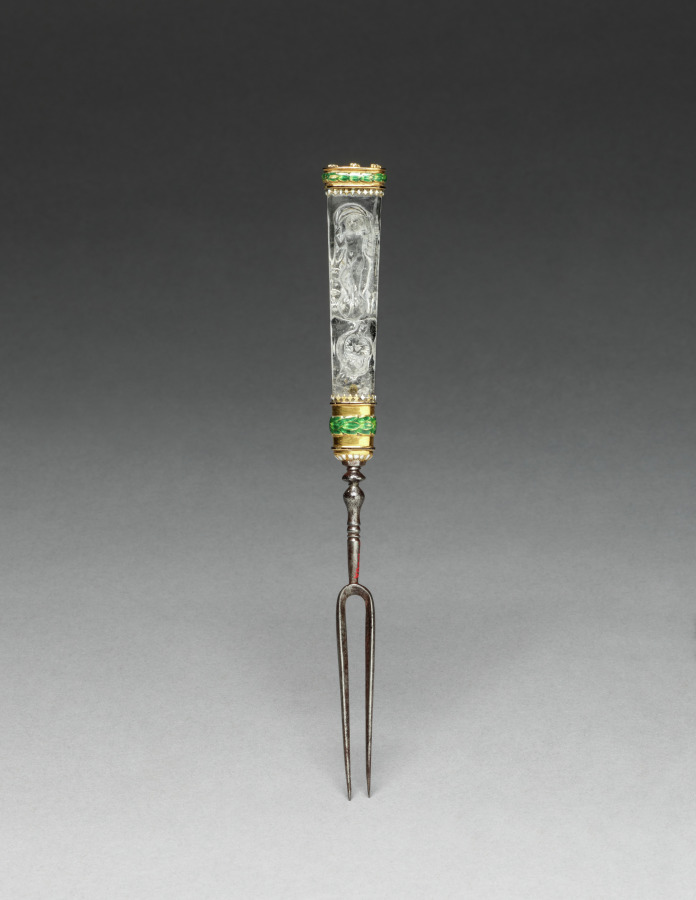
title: Knife and Fork with Sheath (Fork)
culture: Italy, Venice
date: late 1500s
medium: gold, enamel, crystal, steel, leather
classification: Enamel